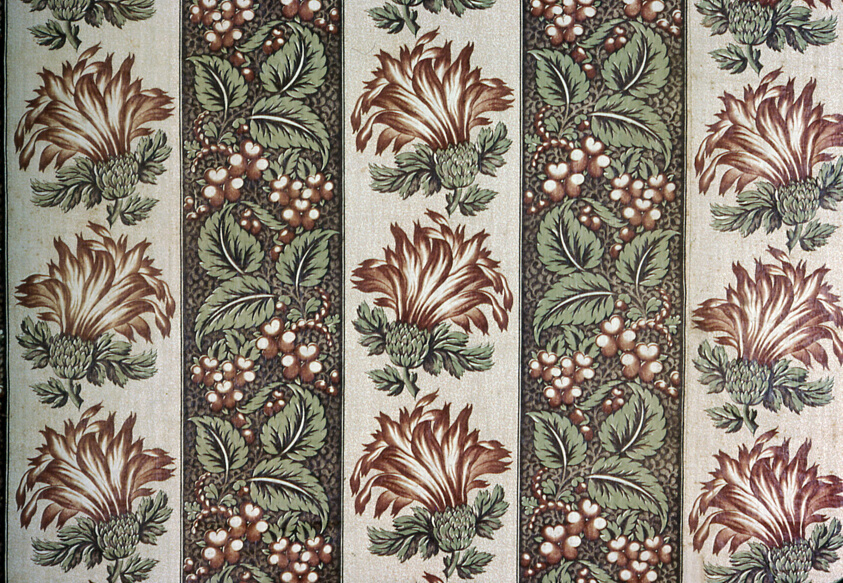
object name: Textile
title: Two Panels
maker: England or France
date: 1775/1800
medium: Cotton, plain weave; probably roller printed; glazed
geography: England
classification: textile; weaving - printed; printed textile